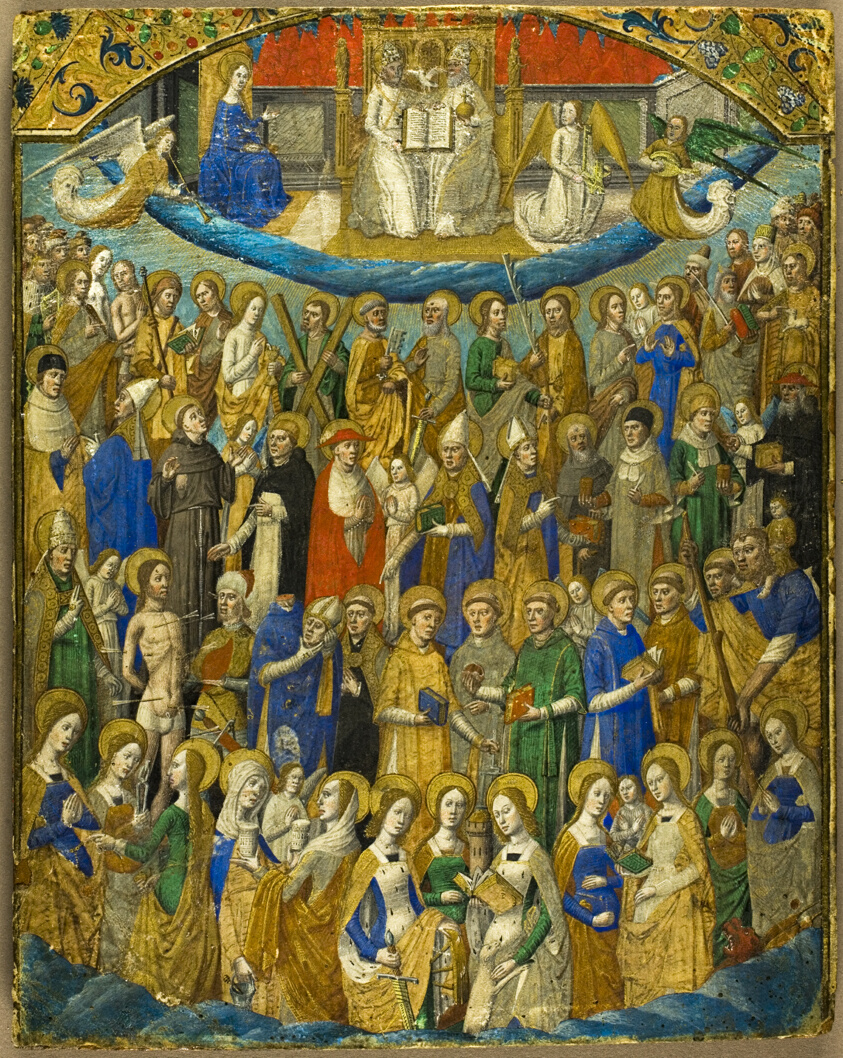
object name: Drawing and Watercolor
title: The Trinity and Saints in Paradise, or La Cour Céleste from a volume of "La Cité de Dieu" by St Augustine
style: medieval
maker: French (Paris); style of Maître François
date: mid–15th century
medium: Tempera and gold leaf on vellum, laid down on wood panel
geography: France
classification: tempera; manuscript; drawings (visual works); prints and drawing